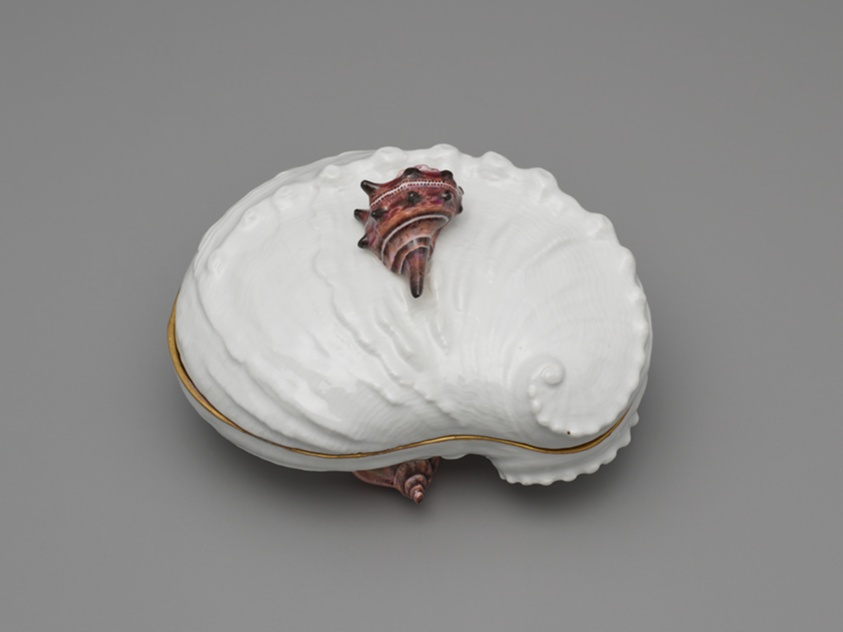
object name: Ceramics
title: Sweetmeat Box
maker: Meissen Porcelain Factory (German, founded 1710); Modeled by J. F. Eberlein (German, 1696-1749)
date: 1746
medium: Hard-paste porcelain, polychrome enamels, and gilt metal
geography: Meissen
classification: porcelain; box; ceramics; enamel; european decorative arts; metal; vessel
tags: shells, seas